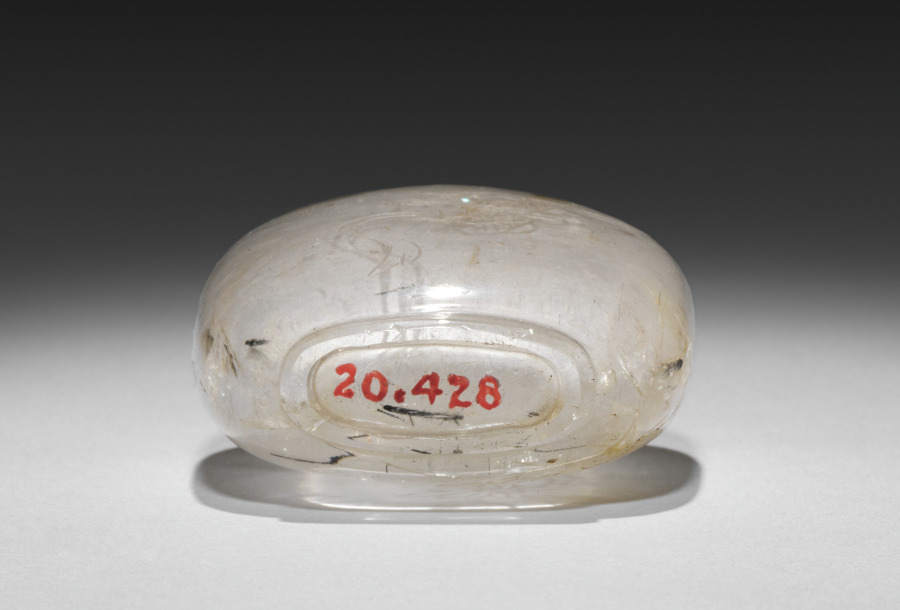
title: Snuff Bottle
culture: China, Qing dynasty (1644-1911)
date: 1644–1911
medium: glass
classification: Glass